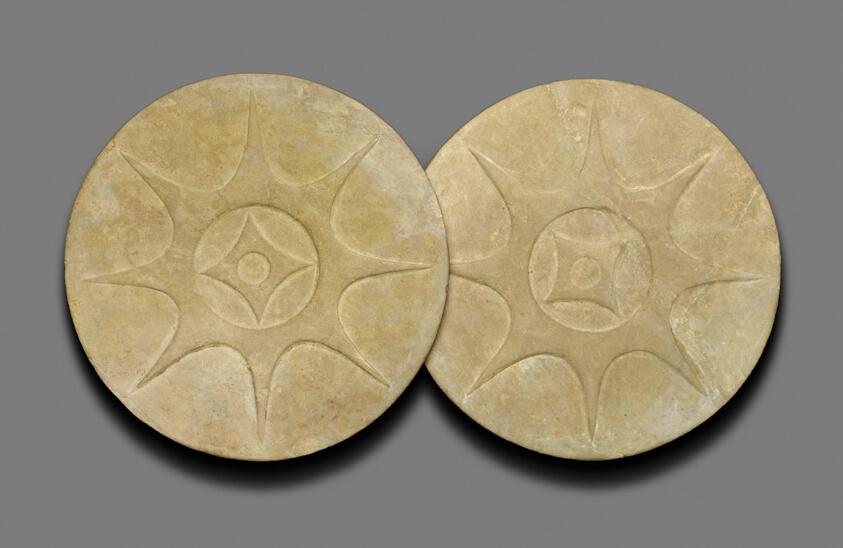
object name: Costume and Accessories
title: Pair of Earspools with Eight-Pointed Star Motif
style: mississippian, native american, archaic america, midwestern, Arts of the Americas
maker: Mississippian (Possibly Oklahoma, LeFlore County, Spiro, United States)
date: 1200–1400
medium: Stone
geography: Oklahoma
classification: ear ornament; art of the americas; costume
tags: star, directions, costume